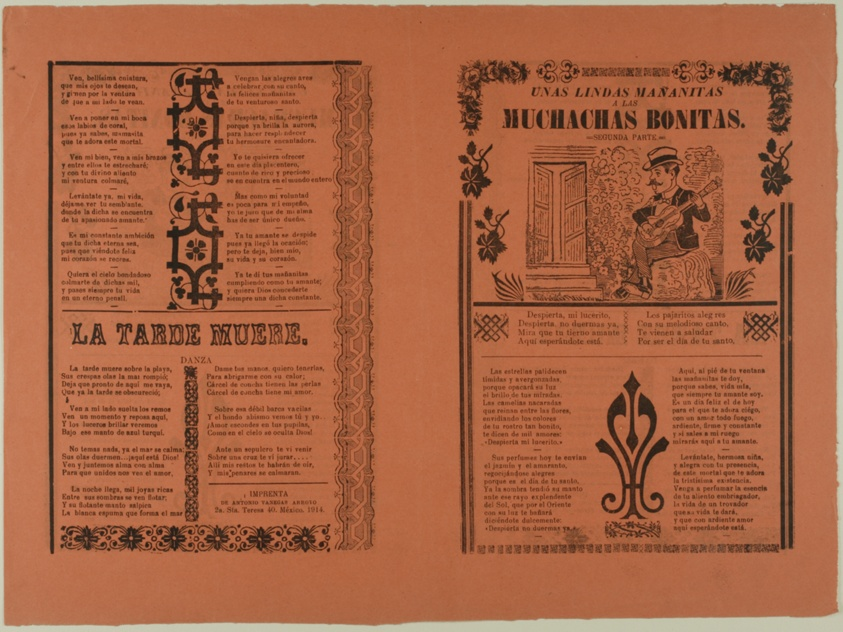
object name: Print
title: Unas lindas mañanitas a las muchachas bonitas (A Lovely Serenade for the Pretty Ladies)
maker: Attributed to José Guadalupe Posada; Mexican, 1852-1913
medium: Relief print on paper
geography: Mexico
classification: relief etching; print; prints and drawing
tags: text